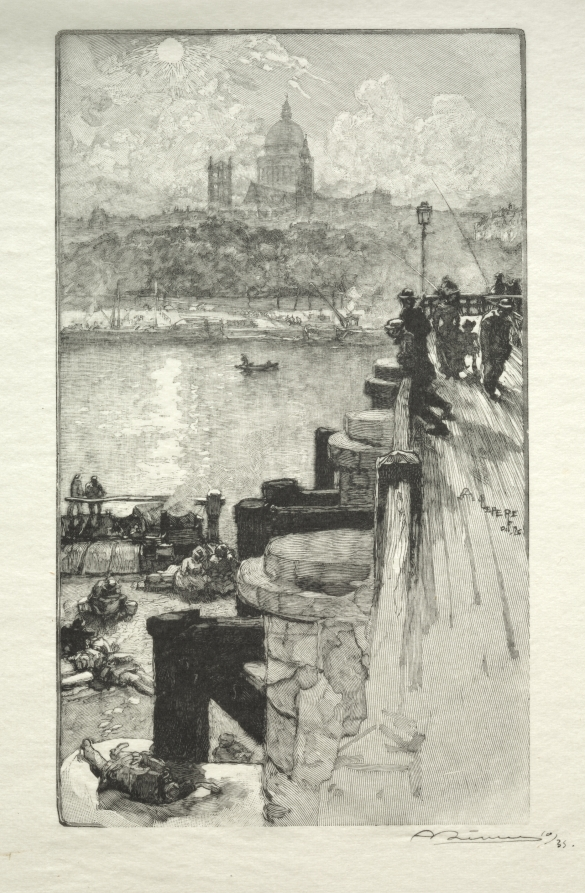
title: Montagne Ste. Genevieve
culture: France, 19th-20th century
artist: Auguste Louis Lepère (French, 1849–1918)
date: 1890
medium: wood engraving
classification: Print